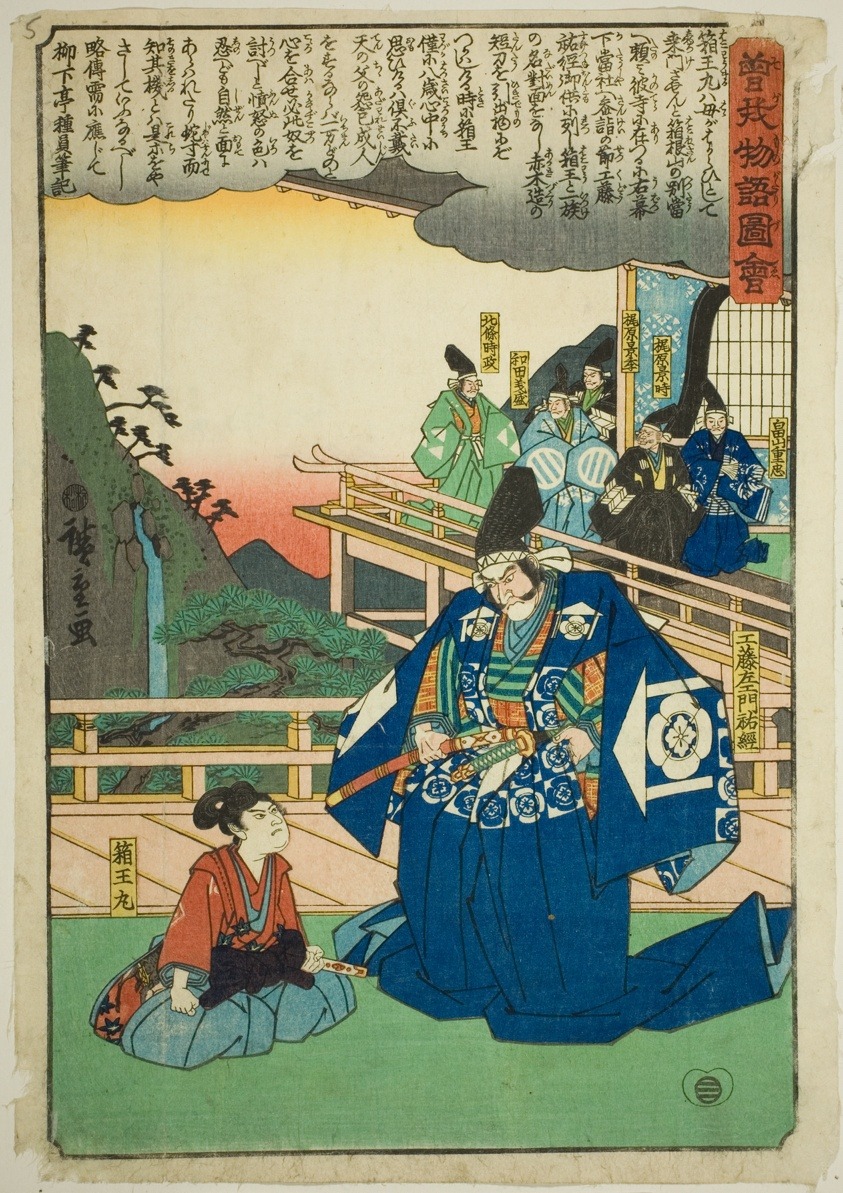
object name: Print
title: Hakoomaru meets Kudo Saemon Suketsune, from the series "Illustrated Tale of the Soga Brothers (Soga monogatari zue)"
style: Japanese (culture or style)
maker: Utagawa Hiroshige 歌川 広重; Japanese, 1797-1858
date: c. 1843/47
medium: Color woodblock print; oban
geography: Japan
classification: woodblock print; print; asian art